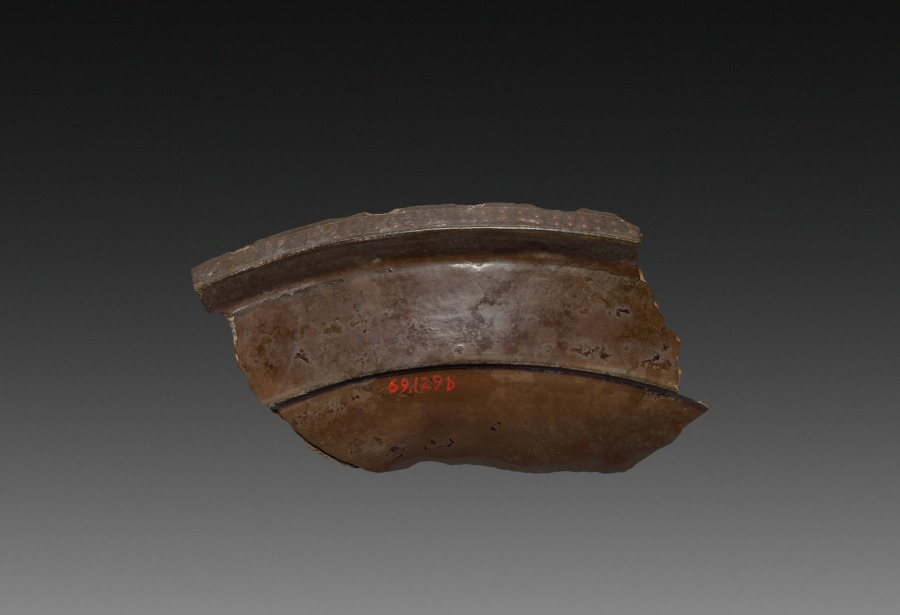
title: Fragment of a Lacquer Tray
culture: China, excavated at Lolang, Xin dynasty (9–23 CE)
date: 9–23 CE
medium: lacquer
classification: Lacquer